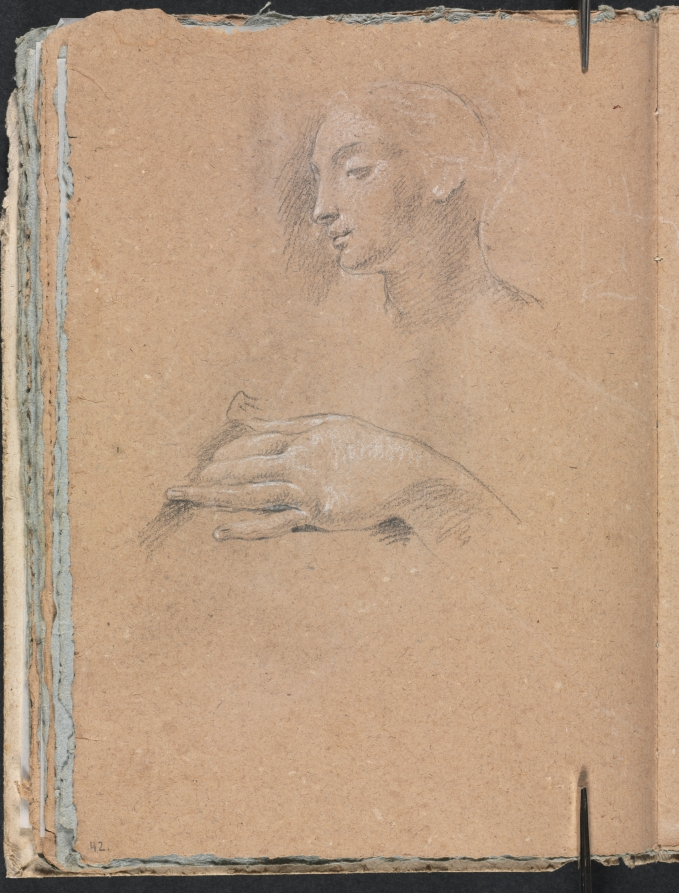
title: Verona Sketchbook: Female head and left hand (page 42)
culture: Italy, 18th century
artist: Francesco Lorenzi (Italian, 1723–1787)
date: 1760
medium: black chalk with white heightening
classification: Bound Volume